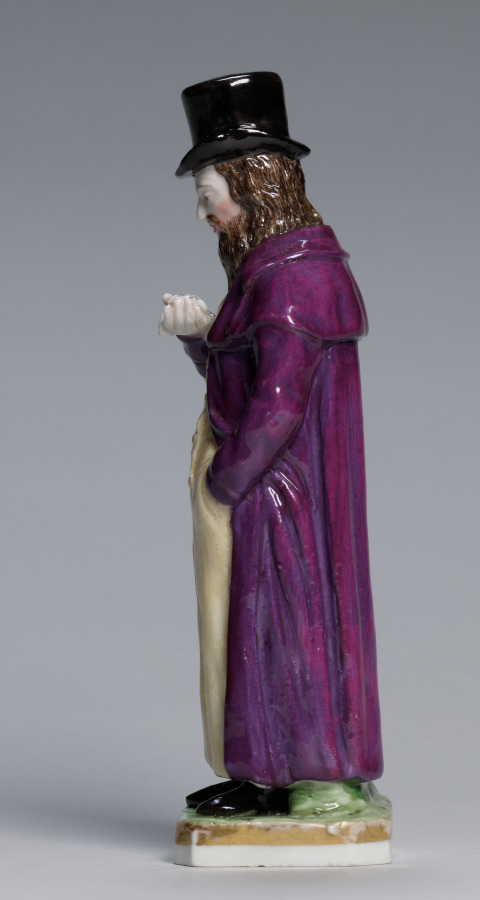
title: Man Holding a Watch (The Buyer)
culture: Russia, Moscow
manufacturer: Gardner Factory (Russian)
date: c. 1820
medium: porcelain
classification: Ceramic